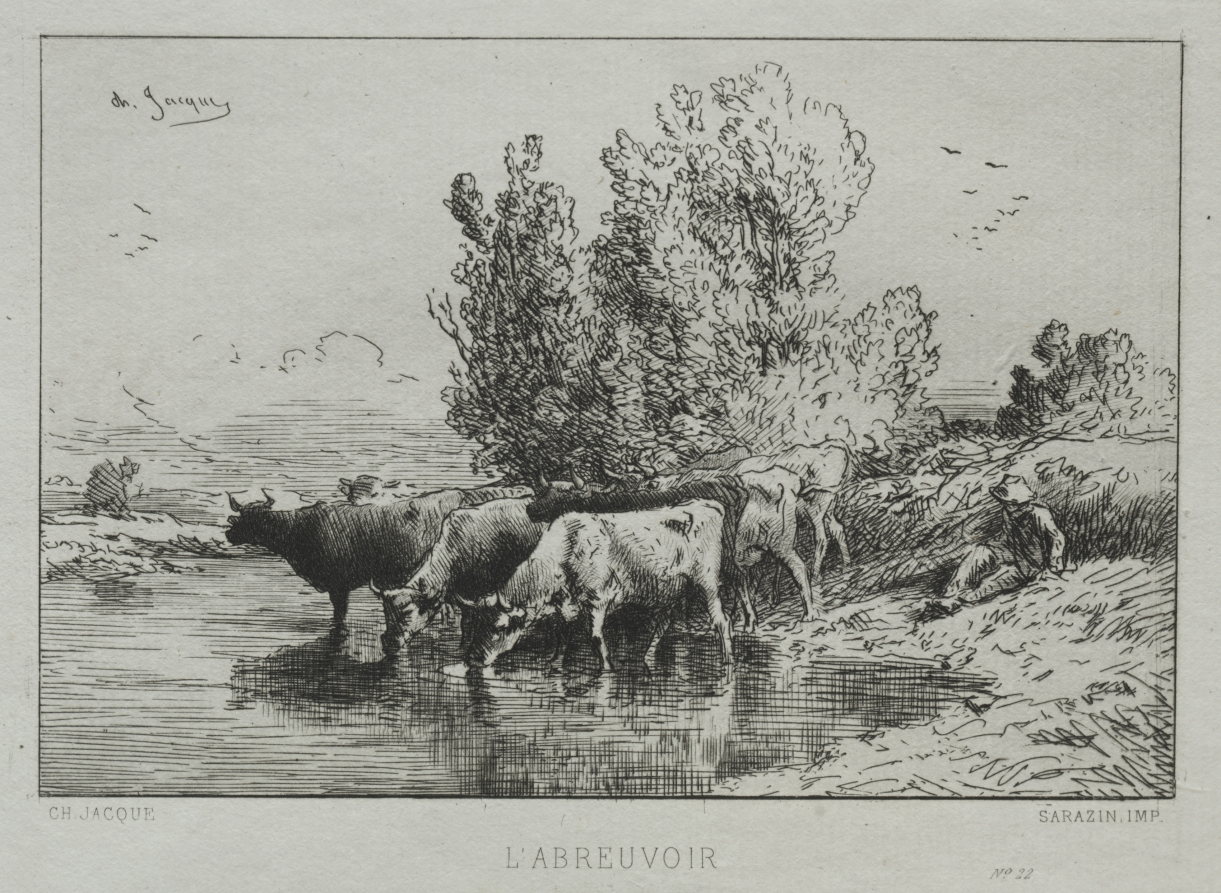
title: The Watering Place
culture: France, 19th century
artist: Charles-Émile Jacque (French, 1813–1894)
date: 1864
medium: etching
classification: Print